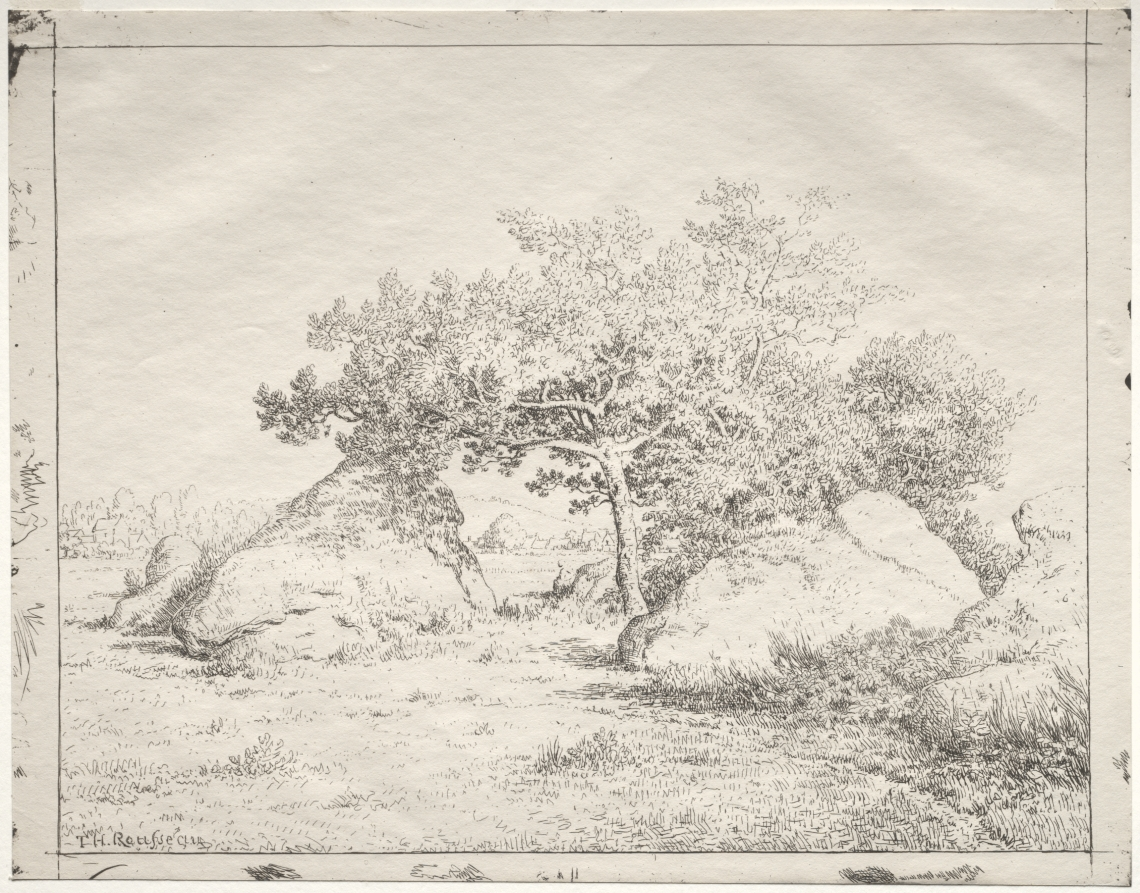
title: Cherry Tree at Blau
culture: France, 19th century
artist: Théodore Rousseau (French, 1812–1867)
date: 1862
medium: cliché-verre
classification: Print